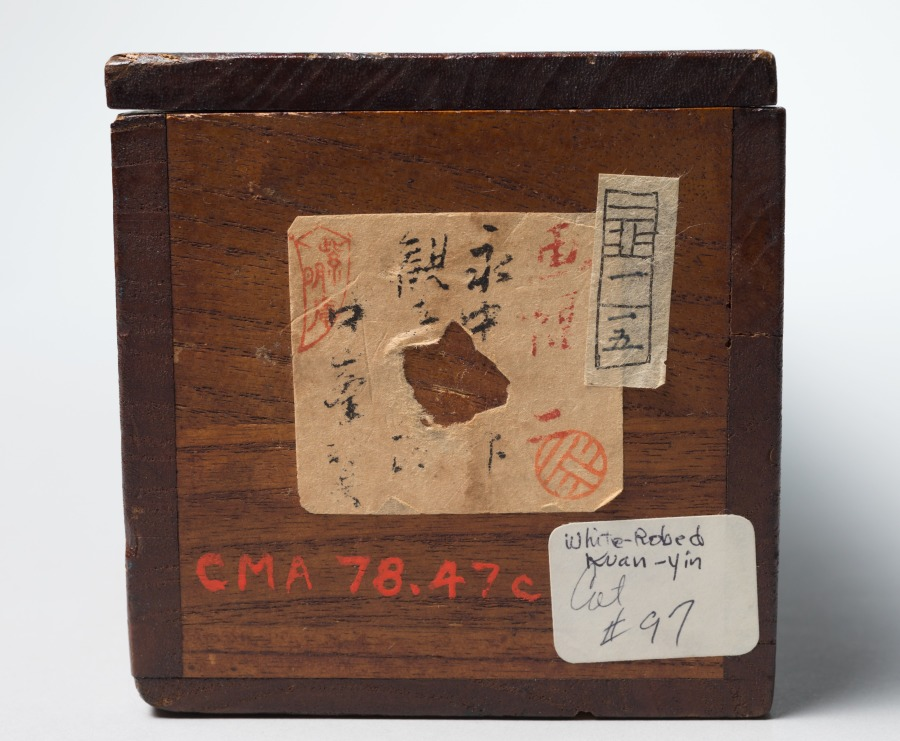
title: White-Robed Guanyin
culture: China, Yuan dynasty (1271-1368)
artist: Jueji Yongzhong (Chinese, active around 1300)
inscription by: Zhongfeng Mingben (Chinese, 1263–1323)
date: late 1200s–early 1300s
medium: hanging scroll; ink on paper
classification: Painting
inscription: Artist's signature: Huanzhu Yongzhong. Inscription by Zhongfeng Mingben: The right thinking [Samkalpa] is embodied within His deep meditation on the Buddha [naga-samadhi]. Retaining not even one single object of thought, A perfect harmony was wonderfully achieved. In the endless time and space, His all-embracing compassion prevails. [signed] Mingben of Huanzhu paying his respects.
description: Guanyin, the bodhisattva of infinite compassion (Avalokiteshvara, in Sanskrit), reveals himself in many forms. According to Buddhist belief, one such manifestation is the white-robed Guanyin sitting on a rock on the island of Putuo (Potalaka, in Sanskrit), located along the coast not far from Ningbo, in Zhejiang Province, China. Here, the figure was swiftly drawn in only a few ink lines. The inscription above is by Zhongfeng Mingben, perhaps the most widely respected and influential Chan (Zen in Japanese) master in the Yuan dynasty. The artist’s signature is a single line below on the left: Huanzhu Yongzhong.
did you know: The CMA collection includes a drawing by a Japanese priest, CMA 1978.47.2, inspired by this composition.